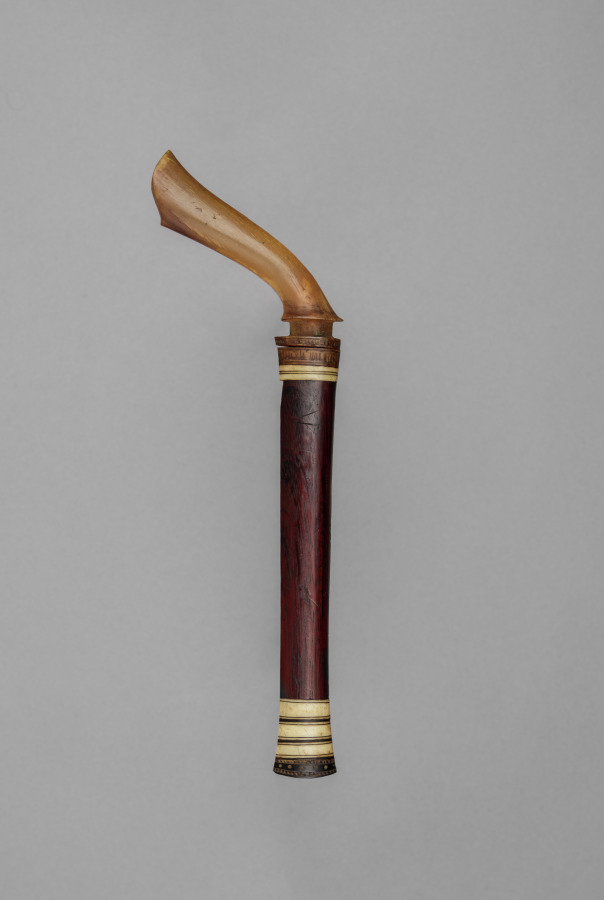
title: Dagger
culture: Sumatra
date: before 1916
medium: Blade: steel; handle: horn; scabbard: wood with bone or ivory, horn, and other inlays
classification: Arms and Armor